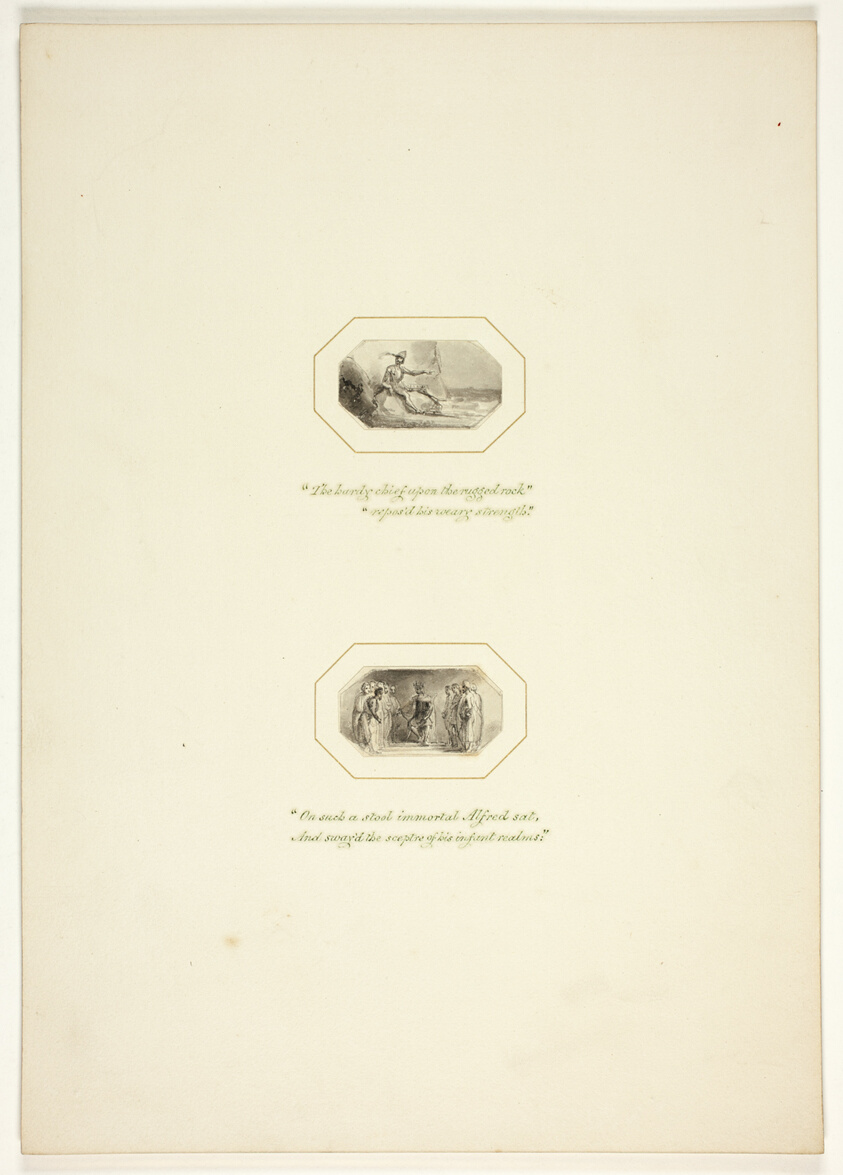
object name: Drawing and Watercolor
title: Study for a plate from The Task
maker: Thomas Stothard (English, 1755-1834)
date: c. 1800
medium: Ink wash on paper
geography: England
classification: ink or chalk wash; drawings (visual works); prints and drawing